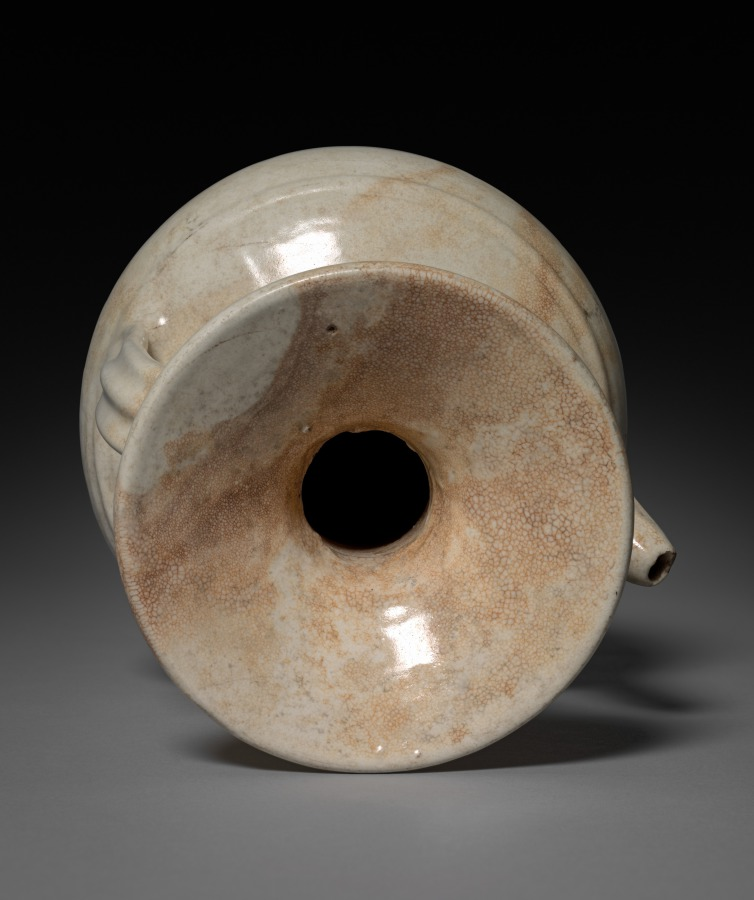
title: Ewer: Cizhou ware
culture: China, Northern Song dynasty (960-1127)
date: 1105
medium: buff stoneware with underglaze slip coating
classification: Ceramic